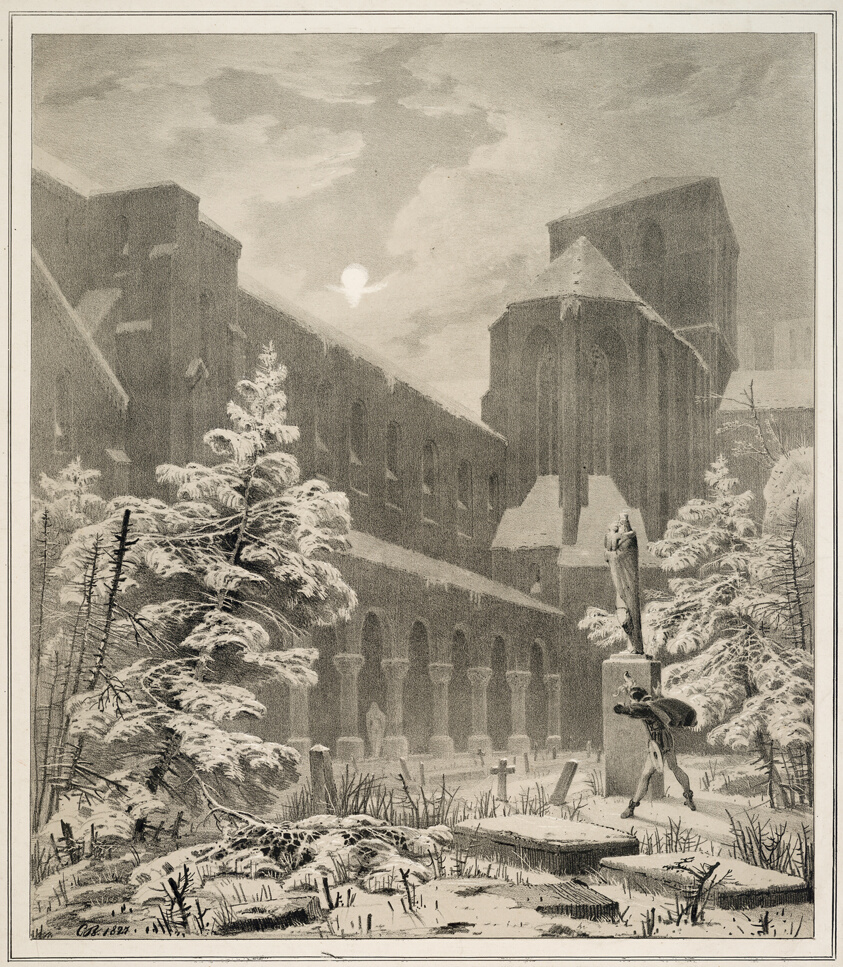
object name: Print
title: Church and Graveyard in the Snow by Moonlight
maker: Carl Blechen (German, 1798-1840)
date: 1827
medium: Lithograph, with gray tone block on cream wove paper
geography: Germany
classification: lithograph; print; prints and drawing